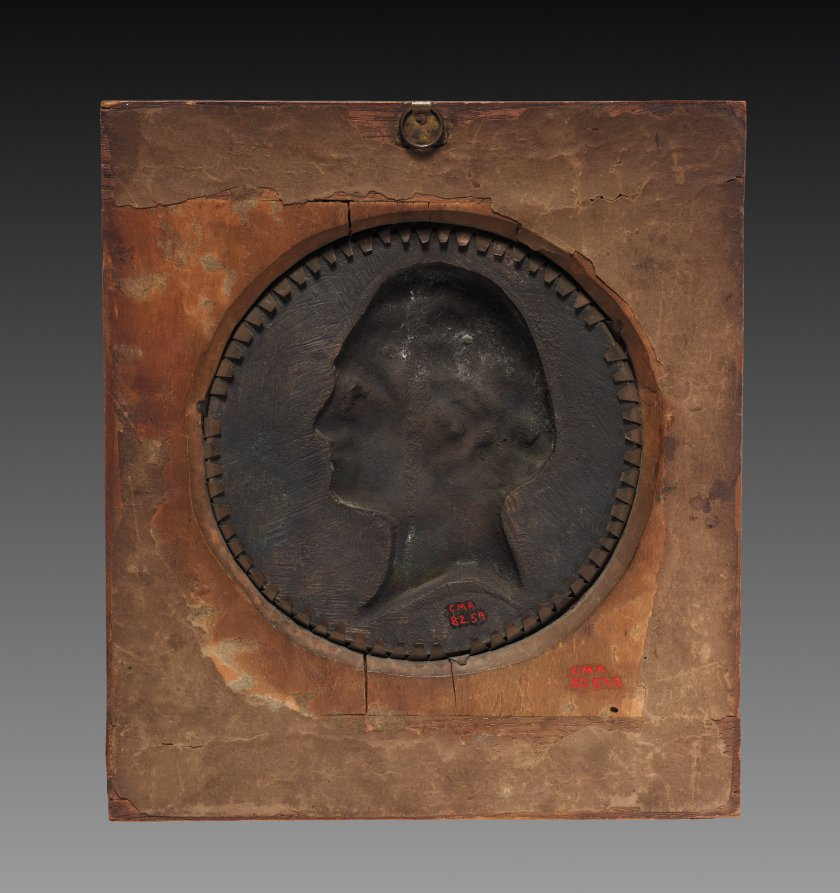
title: Portrait Medallion of Pigault-Lebrun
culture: France, 19th century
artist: Pierre Jean David d'Angers (French, 1788–1856)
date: 1831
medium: bronze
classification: Sculpture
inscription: inscribed beneath cut of neck: "David/ 1831"; inscribed at left: "Pigault Lebrun."